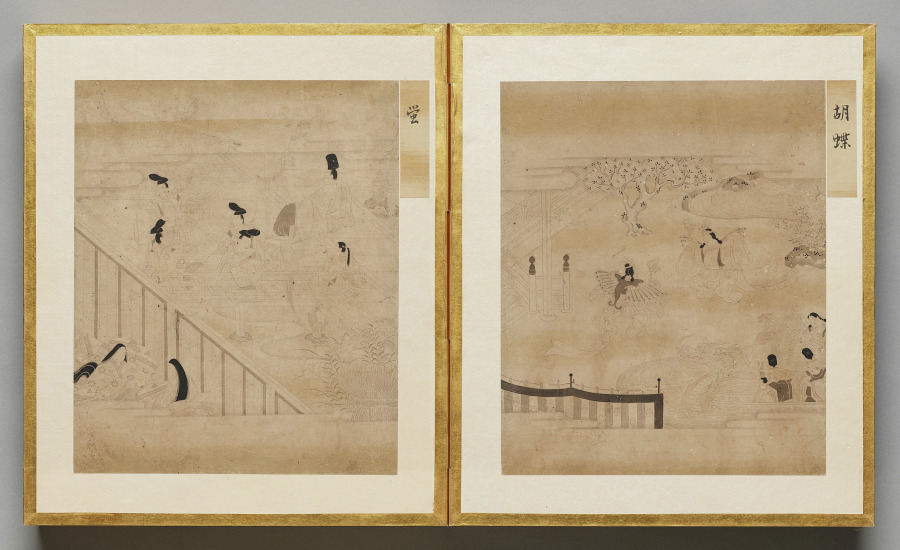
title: Butterflies from Album of Illustrations for the Tale of Genji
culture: Japan, Edo period (1615–1868)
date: 1600s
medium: painting in an accordion-style album; ink, light color, and gold on paper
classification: Bound Volume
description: This album contains illustrations for the classic literary work the Tale of Genji, authored in the 1000s by Murasaki Shikibu, an aristocrat of the Heian period (794–1185) court. The scenes are painted in the “white drawing” (hakubyō) mode, in which a fine ink line is used to depict figures and spaces with great subtlety, punctuated only occasionally by traces of red pigment for a character’s lips, a detail of a garment, or a decorative element. These two scenes illustrate episodes from the chapters “Thin Veil of Cloud” (Usugumo) and “Barrier Gate” (Sekiya).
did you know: The illustrations are identified by chapter title in cartouches to the upper right of the paintings.